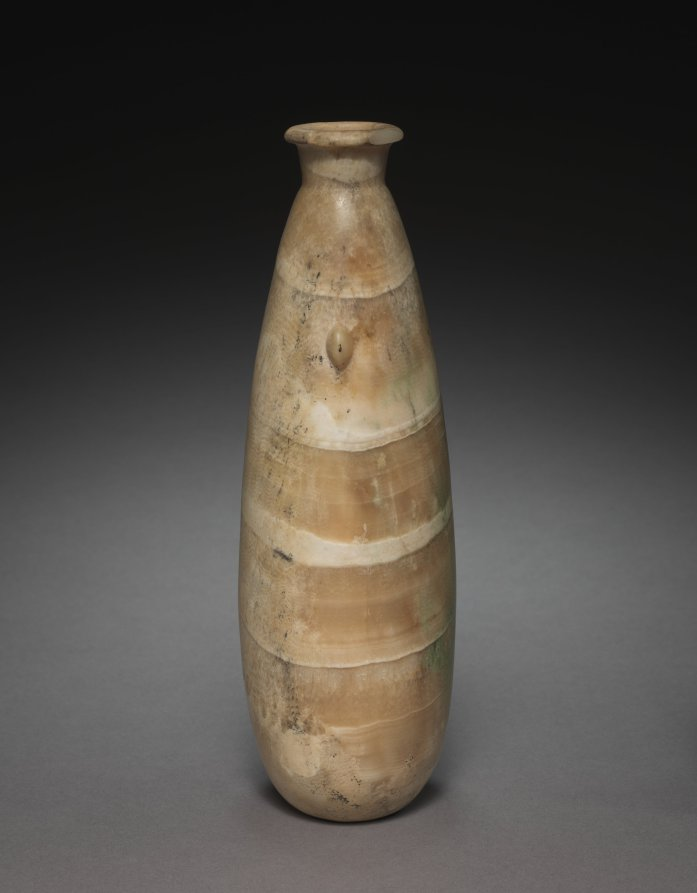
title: Alabastron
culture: Egypt, Late period (715–332 BCE), Dynasty 26 or later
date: 664–525 BCE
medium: travertine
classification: Vessels